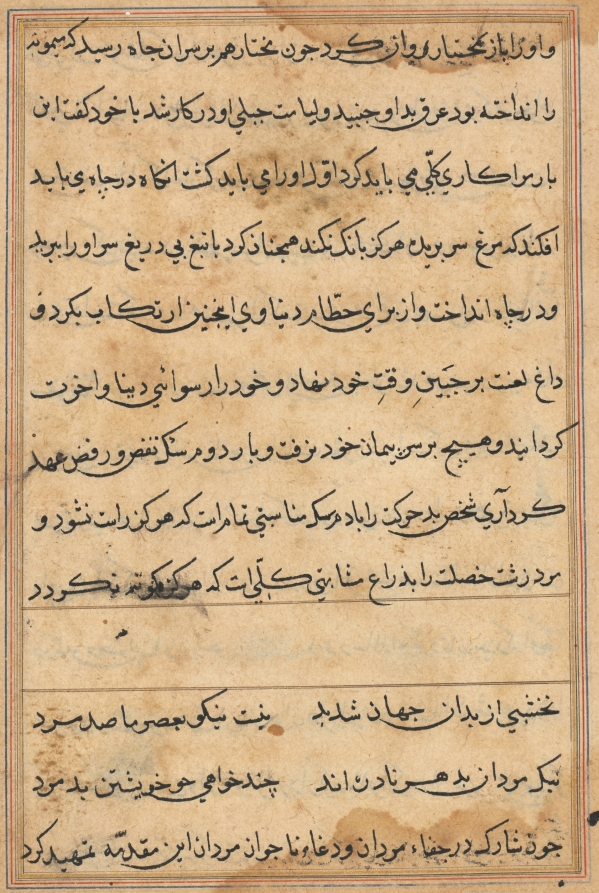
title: Page from Tales of a Parrot (Tuti-nama): text page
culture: Mughal India, court of Akbar (reigned 1556–1605)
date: c. 1560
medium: gum tempera, ink, and gold on paper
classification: Painting